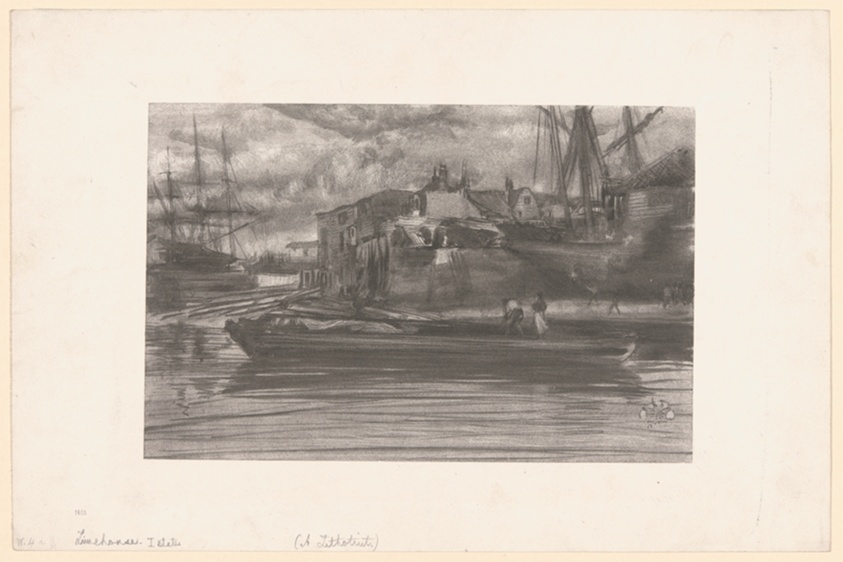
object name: Print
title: Limehouse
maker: James McNeill Whistler (American, 1834-1903)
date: 1878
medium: Lithotint in black ink with scraping and incising, on a prepared half-tint ground, on off-white plate paper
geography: United States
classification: lithotint; lithograph; print; prints and drawing; paper